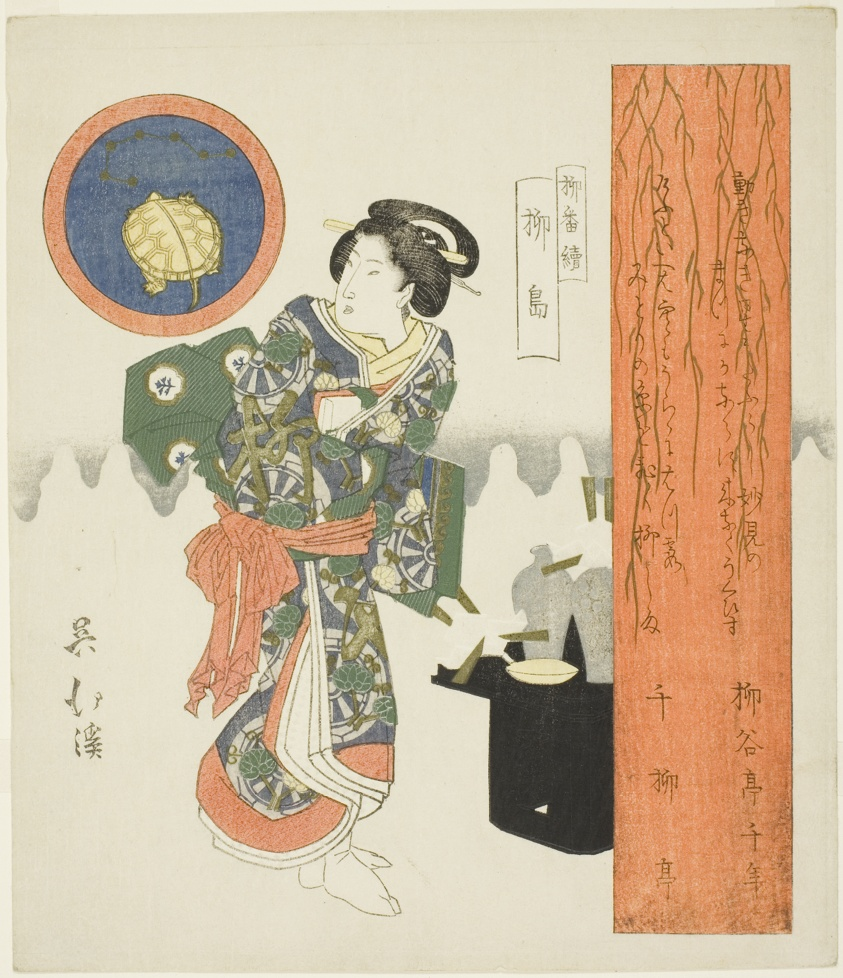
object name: Print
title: Willow Island (Yanagishima), from the series "A Series of Willows (Yanagi bantsuzuki)"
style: Japanese (culture or style)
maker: Totoya Hokkei (Japanese, 1780-1850)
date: c. 1828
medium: Color woodblock print; shikishiban, surimono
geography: Japan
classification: woodblock print; print; asian art